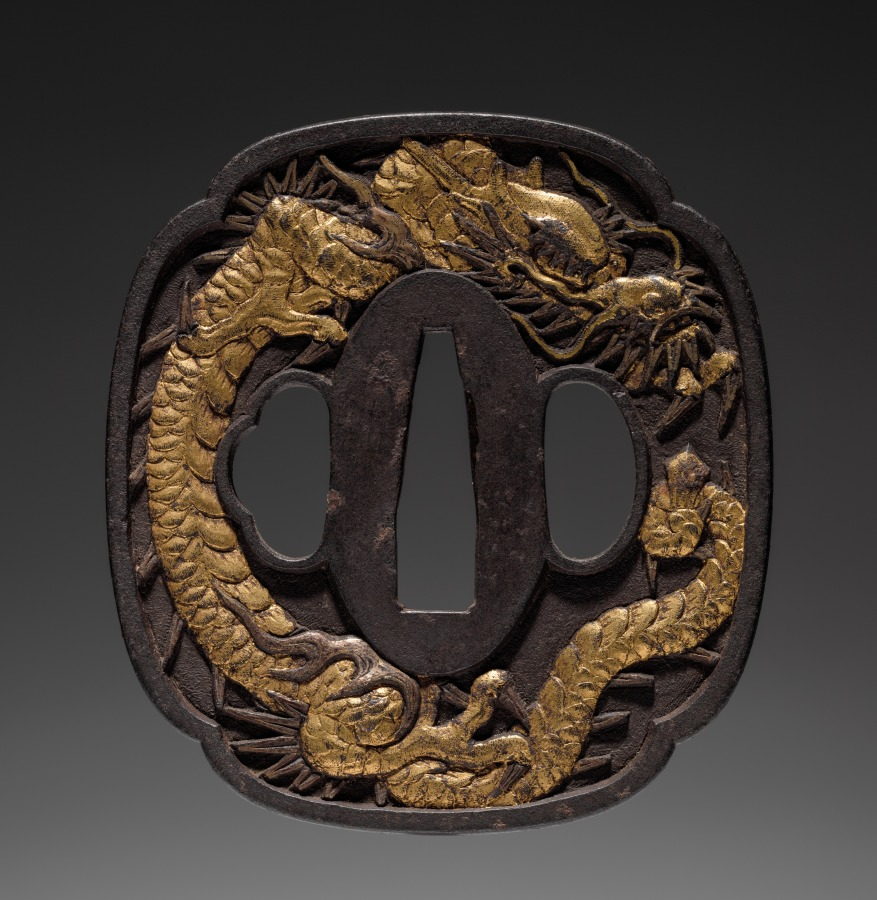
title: Sword Guard (Tsuba) with Dragon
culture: Japan, Edo period (1615–1868)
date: mid-1800s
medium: iron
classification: Arms and Armor